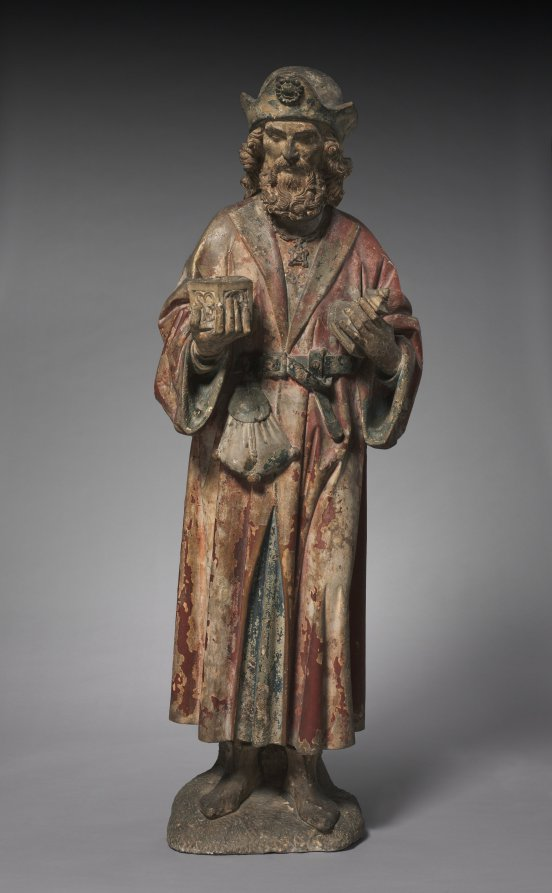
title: Magus from an Adoration Group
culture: France, possibly Champagne, 15th century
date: c. 1460–1475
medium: polychromed limestone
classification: Sculpture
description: This sculpture represents one of the three Magi or kings who witnessed the birth of Jesus. The Magi are identified as Caspar, Melchior, and Balthazar and are typically shown in art bearing their gifts of gold, frankincense, and myrrh. Joseph is often present in these scenes as are shepherds.The single figure shown here was originally part of a sculptural group with many figures. He is shown holding an ornate receptacle with lid. Other figures from the group are not known to have survived, and which Magus the sculpture was intended to represent cannot be clearly established.